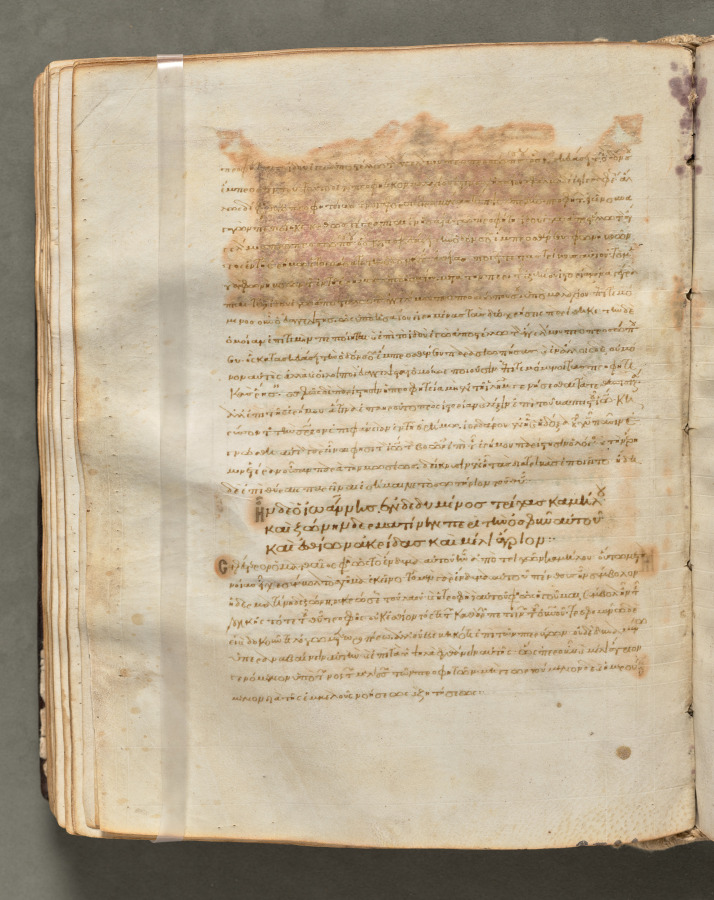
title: Text, folio 132 (verso), from a Gospel Book with Commentaries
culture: Byzantium, Constantinople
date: c. 1000–1100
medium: ink, tempera, and gold on vellum; leather binding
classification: Bound Volume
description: Each of the four gospels in this book opens on a page with brilliantly illuminated borders depicting the author of the text as well as birds-principally peacocks, symbols of the immortality of the soul-and fountains, representing the fountain of life and the salvation of the soul. This volume consists of 428 leaves with texts in Greek. Its level of sophistication suggests that it was probably written and decorated in a monastery in Constantinople.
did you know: Gospel Books were carried in procession through Byzantine churches.